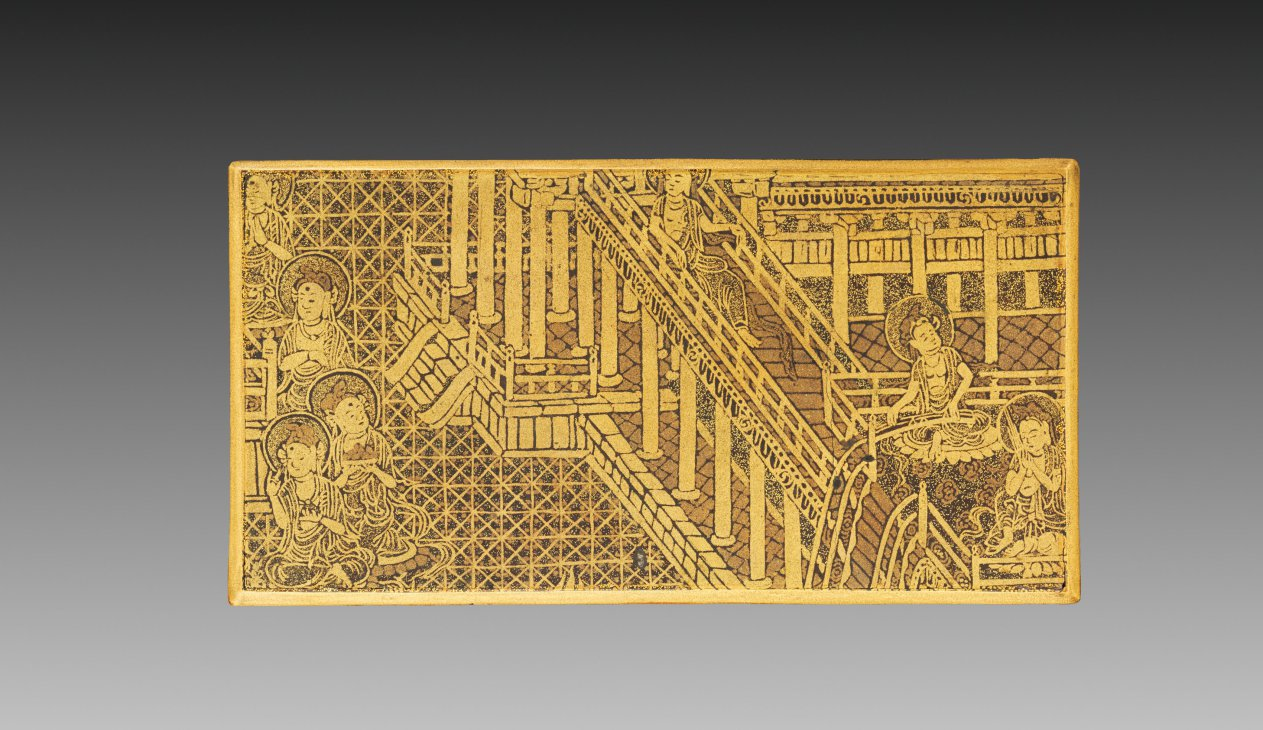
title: Fragment Mounted as a Box Cover with a Scene from Amida's Paradise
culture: Japan, Heian period (794–1185)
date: 1100s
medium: gold lacquer on wood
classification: Lacquer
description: The lid of this box has a fragment of an image representing the Pure Land of the Buddha Amida, and an interior decorated with lotus petals. The original, complete composition may have been a panel housed within a shrine cabinet, and used for meditation. An aversion to discarding sacred images likely led to the fragment’s incorporation into this small box.